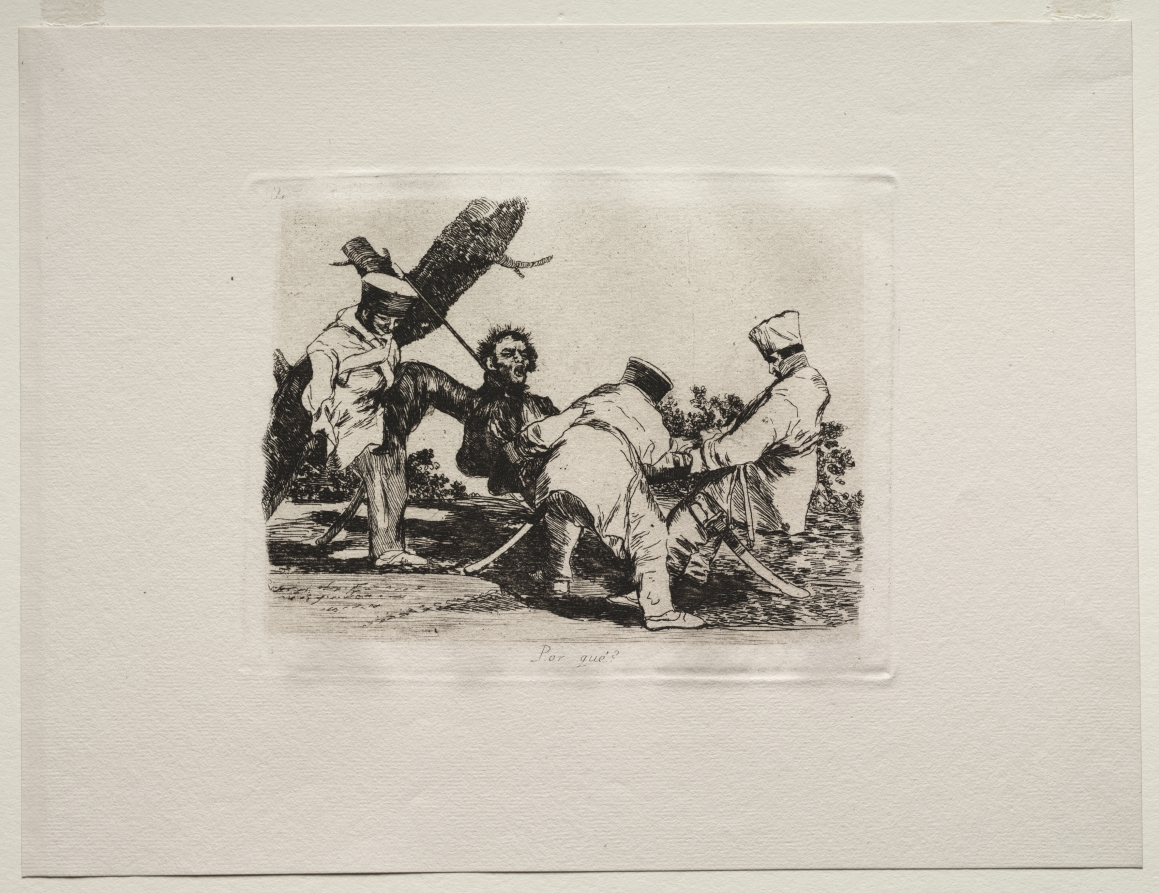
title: The Horrors of War: Why?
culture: Spain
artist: Francisco de Goya (Spanish, 1746–1828)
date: 1810–20, published 1863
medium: etching and aquatint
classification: Print